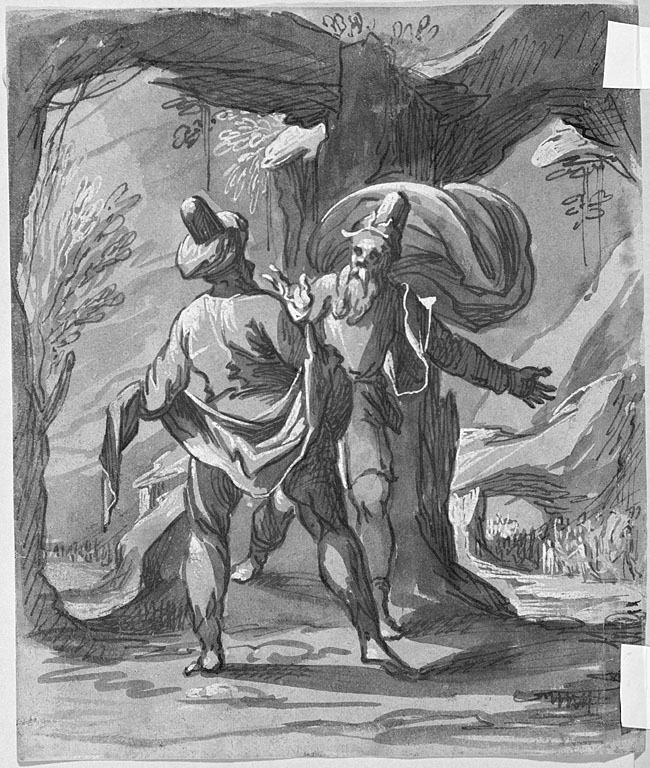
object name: Drawing and Watercolor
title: Adam and Eve Under a Tree (recto); Two Men in Dispute (verso)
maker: Hermann Weyer (German, c. 1596-1621)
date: 1610/20 (recto); 1616/21 (verso)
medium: Pen and black ink, with brush and gray and brown wash, heightened with white gouache, on cream laid paper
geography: Germany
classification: pen and ink drawings; drawings (visual works); prints and drawing